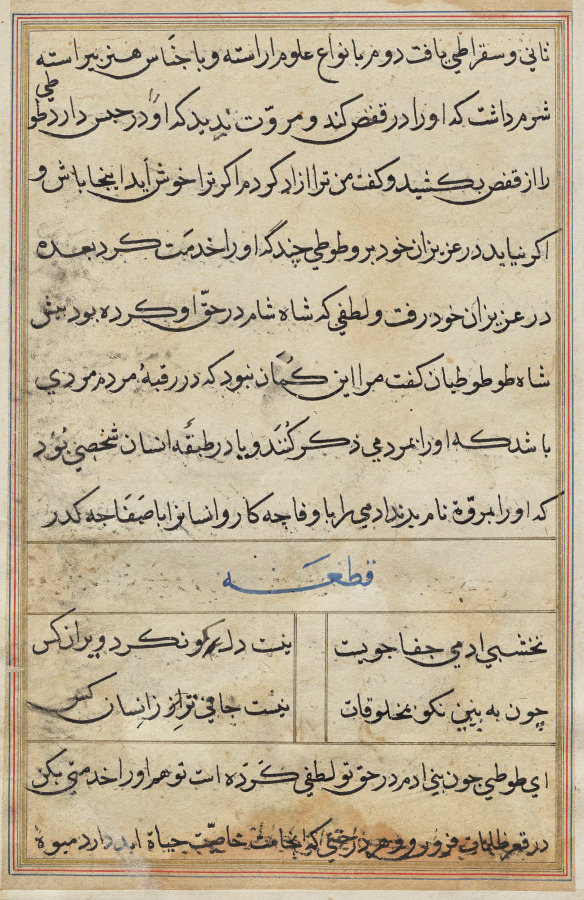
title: Page from Tales of a Parrot (Tuti-nama): text page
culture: Mughal India, court of Akbar (reigned 1556–1605)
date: c. 1560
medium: gum tempera, ink, and gold on paper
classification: Painting